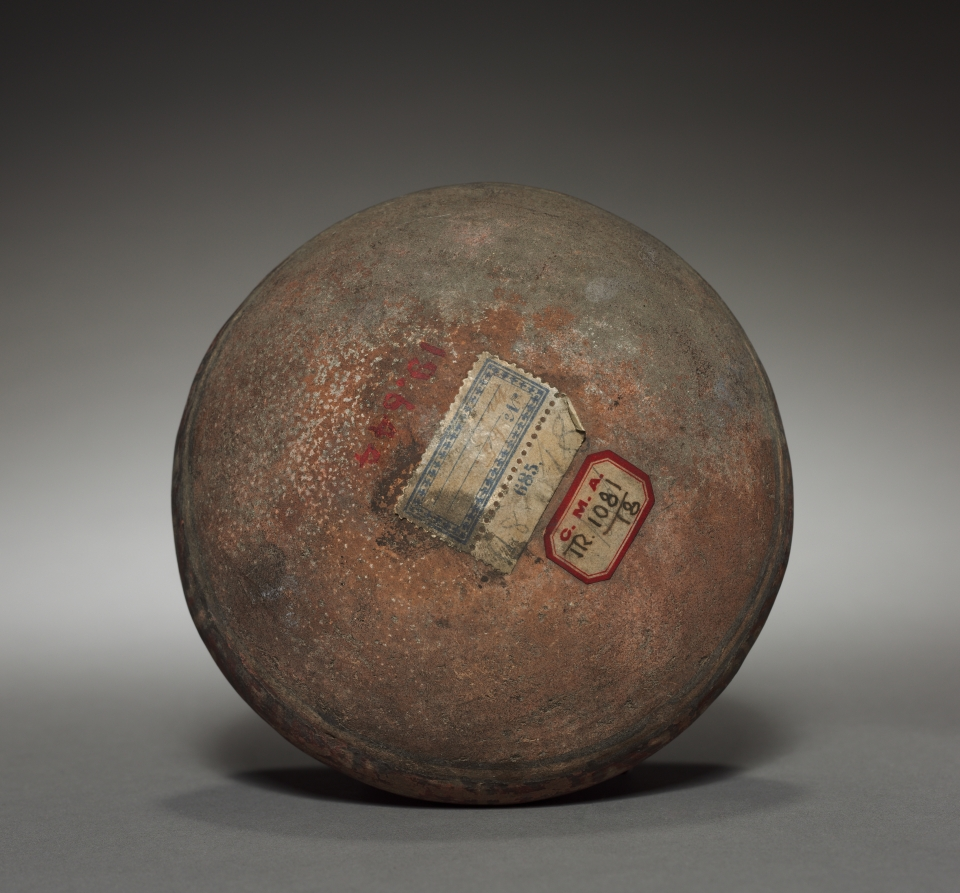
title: Bowl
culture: Peru, South Coast, 10th-11th century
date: 900–1100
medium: pottery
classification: Ceramic